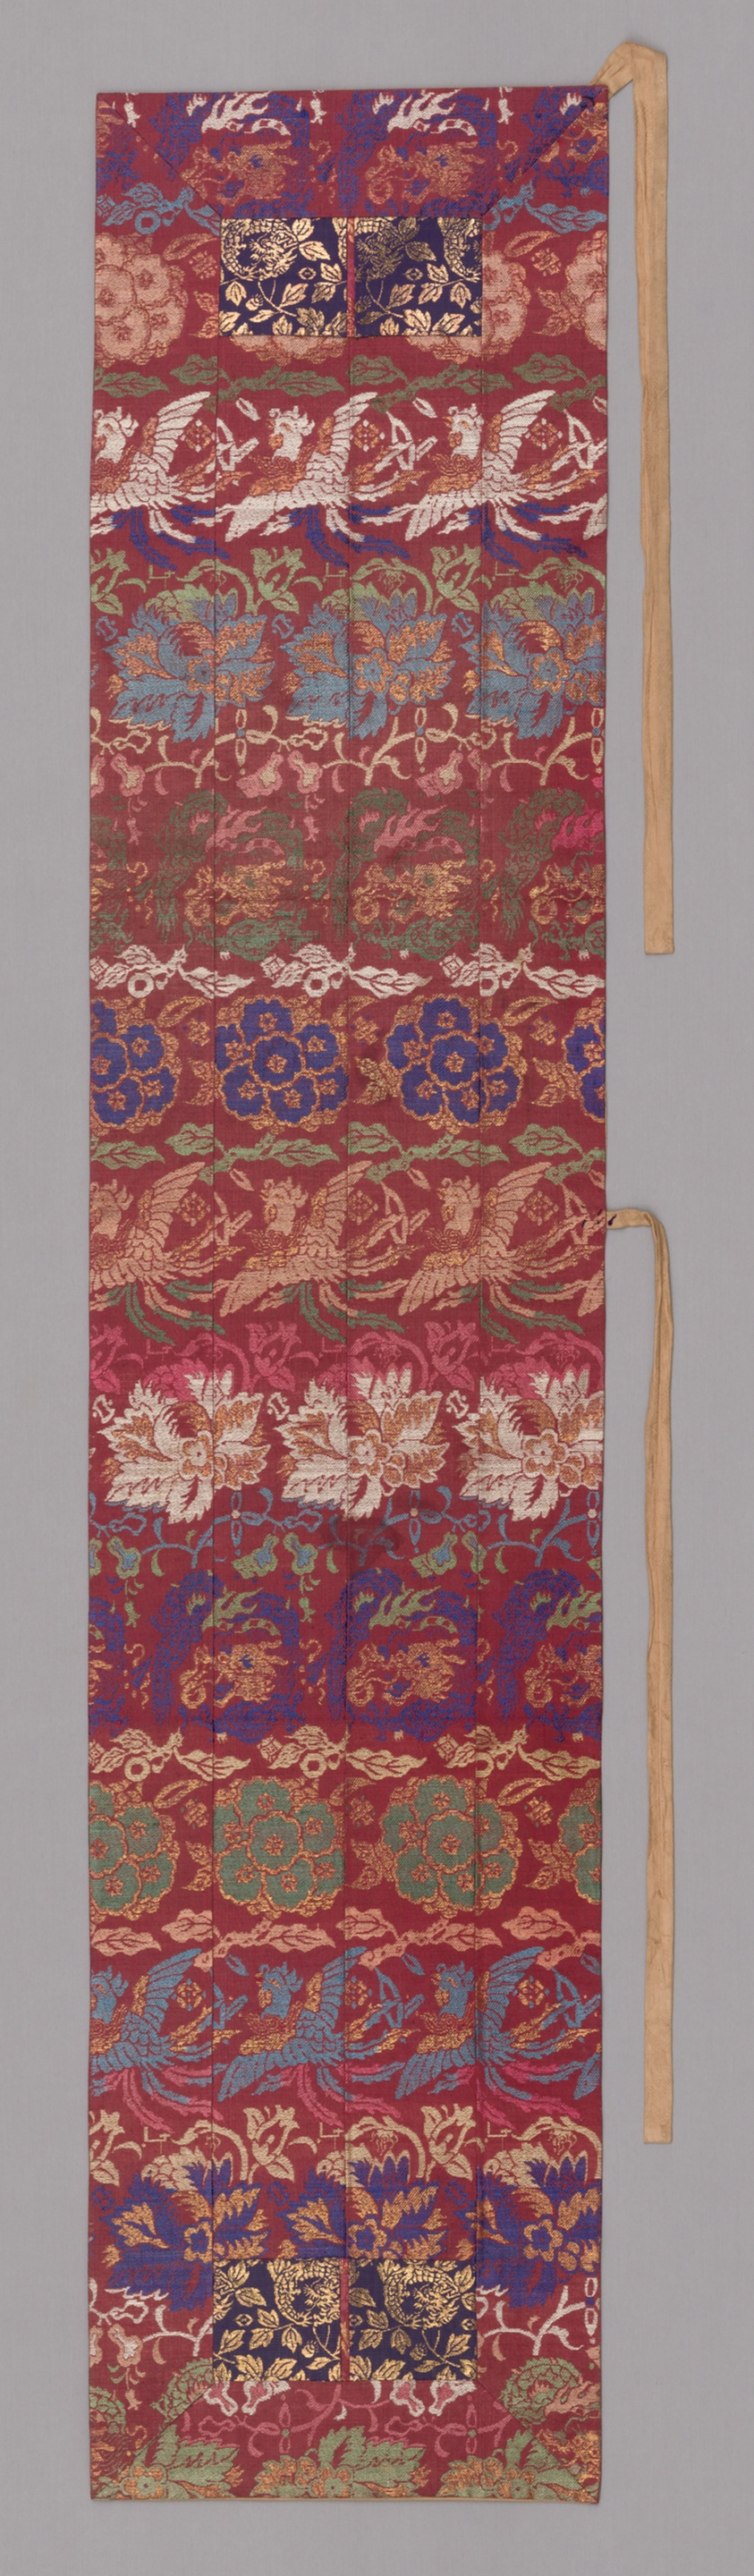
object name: Textile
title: Ôhi (Stole)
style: late edo, meiji, Japanism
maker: Japan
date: late Edo period (1789–1868)/ Meiji period (1868–1912), 1850/90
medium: Heri, yô, and jô: silk, cotton and gold-leaf-over-lacquered paper strip, twill weave with twill interlacings of secondary binding warps and supplementary patterning wefts; shiten: silk, cotton and gold-leaf-over-lacquered paper strip, twill weave with twill interlacings of secondary binding warps and supplementary patterning wefts; lining: cotton, mixed twill weave self-patterned by main warp and ground weft floats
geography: Japan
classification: textile; weaving; liturgical - buddhist